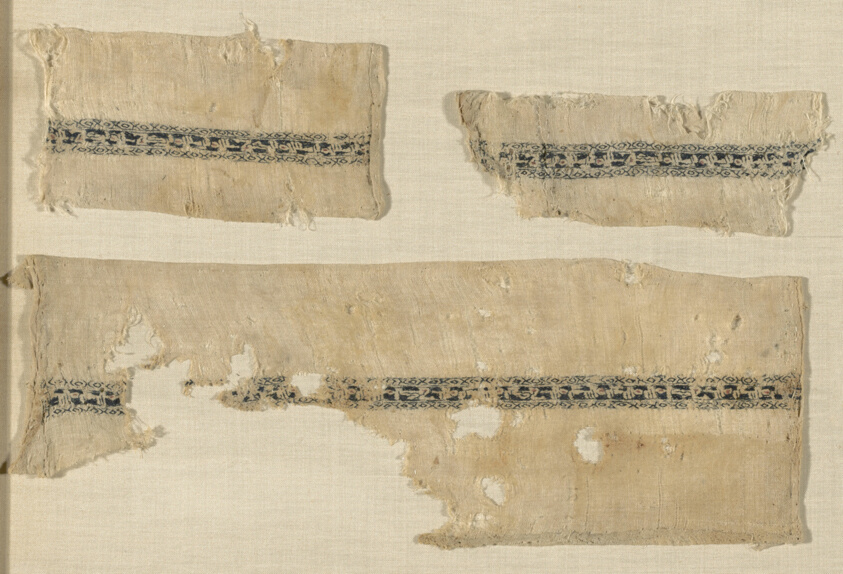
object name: Textile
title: Fragment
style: fatimid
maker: Egypt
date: Fatimid period (969–1171)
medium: Plain simple cloth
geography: Egypt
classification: textile; weaving